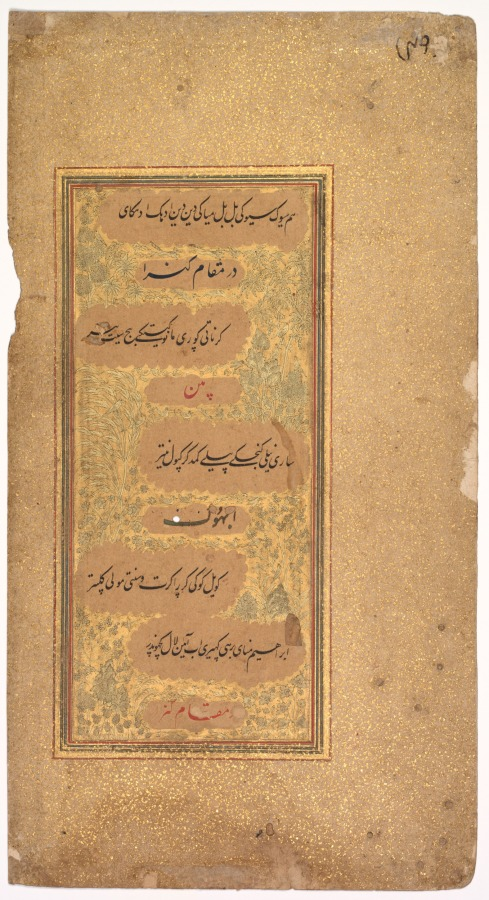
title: From Dohras (Songs) 40 and 36 from the Kitab-i Nauras of Sultan Ibrahim Adil Shah II (verso)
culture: India, Bijapur, Deccan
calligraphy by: Khalilullah Butshikan (Persian, active in India 1596–c. 1620)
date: 1618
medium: ink with two-tone gold on paper, double-sided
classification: Painting